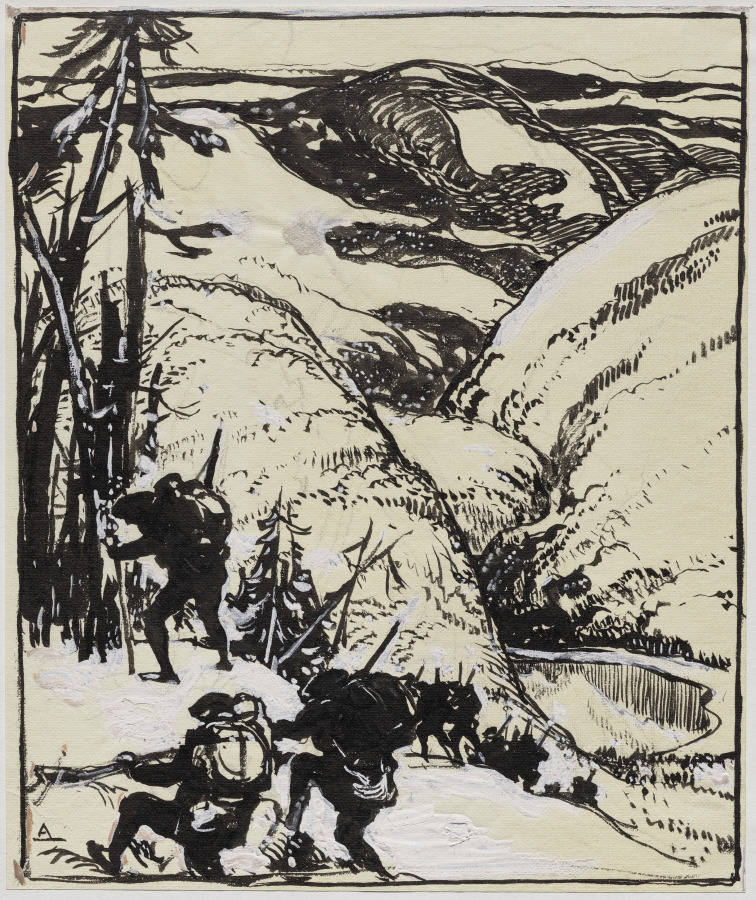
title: Dans les Vosges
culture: France, 20th century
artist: Auguste Louis Lepère (French, 1849–1918)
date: 1914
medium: brush and black ink over pencil with white highlights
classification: Drawing